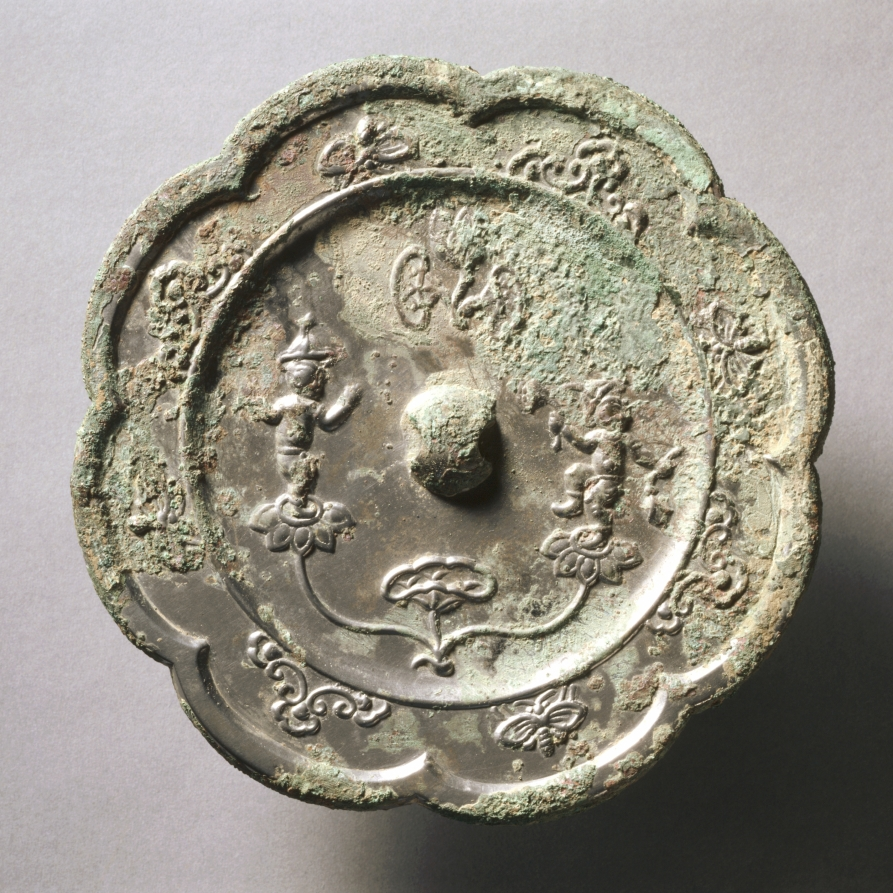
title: Lobed Mirror with Acrobats on Lotus Blossoms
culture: China, Tang dynasty (618-907)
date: early 600s-early 900s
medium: bronze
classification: Metalwork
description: The reflecting surfaces of the mirrors were smooth and highly polished. Although much of the reflecting surface is corroded here, a small area of the original polished surface can be observed.